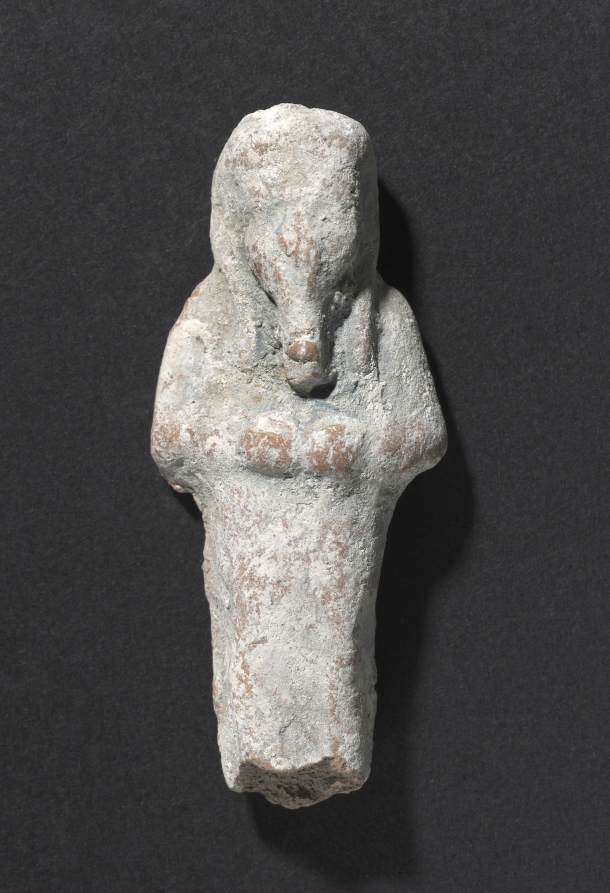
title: Shawabty of Ditamenpaankh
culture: Egypt, Late period (715–332 BCE), Dynasty 25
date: 715–656 BCE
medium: terracotta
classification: Funerary Equipment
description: High demand for shawabtys in the Late Period, a time when as many as 400 or more shawabtys were placed in the tomb with the deceased, gave rise to a specialized container for storing them: the shawabty box. This example is inscribed for the lady of the house, Ditamenpaankh, and was probably one of a pair originally made for her. The single-masted boat on the box's lid is perhaps an allusion to the pilgrimage of the deceased to the holy city of Abydos, the cult city of Osiris, king of the dead. The shawabtys inside are crude, mass-produced examples cast in an open mold. Made of terracotta, their blue paint imitates more costly shawabtys made of faience. As for the shawabty spell, it has been removed from its traditional location on the shawabty's front and relocated onto the sides of box, where it needed only to be written once, thus expediting production.